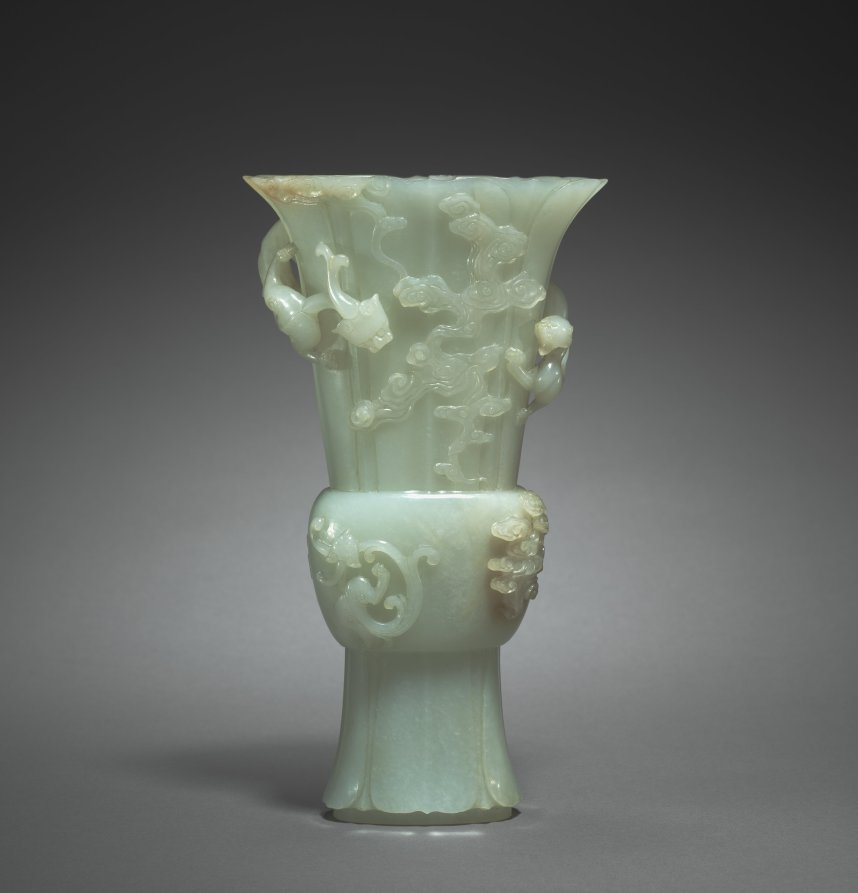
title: Vase in Form of Archaic Zun with Dragons in Relief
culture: China, Qing dynasty (1644–1911), Qianlong reign (1736–95)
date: 1736–95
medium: white jade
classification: Jade